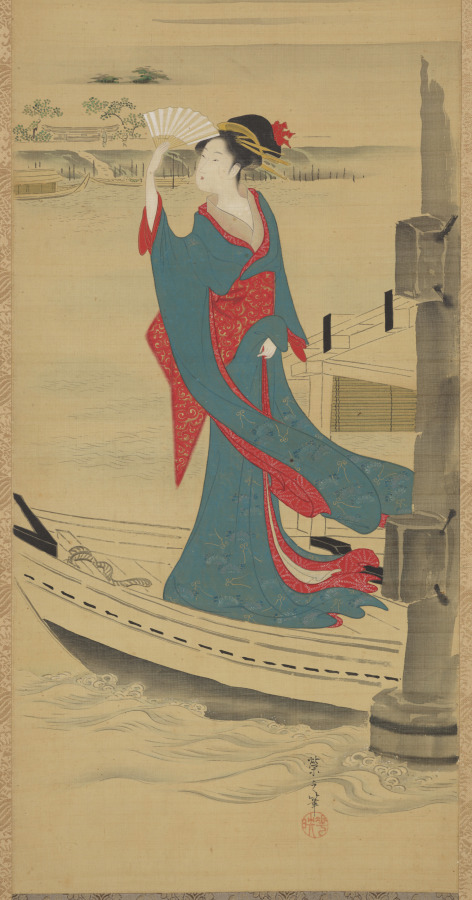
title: Beauty in a Boat on Sumida River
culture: Japan, Edo period (1615–1868)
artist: Chōbunsai Eishi (Japanese, 1756–1829)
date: c. 1801–4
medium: hanging scroll; ink and color on silk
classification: Painting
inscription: artist's signature 栄之筆 and seal, lower right.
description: The Sumida River was a popular refuge from the heat and humidity of the city during the summer. One can see the torii gate of Mimeguri Shrine just to the left of the woman's fan.